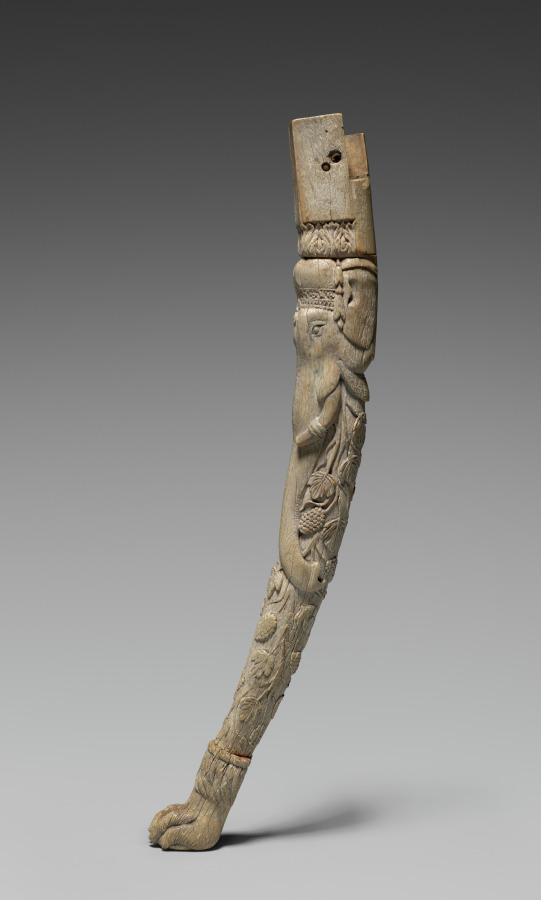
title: Chair Leg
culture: Afghanistan, Begram, Kushan period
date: 300s CE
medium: ivory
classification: Ivory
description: This ivory carving was made to sheath wooden furniture made in India for trade along the Silk Road, which stretched from Rome to China. Indian ivory-faced furnishings--along with lacquer boxes from China and painted glass from Rome--were found in an extraordinary deposit of luxury goods at a site called Begram. The wood on which the ivory and lacquer were affixed has long disintegrated, and only the small pieces remain.